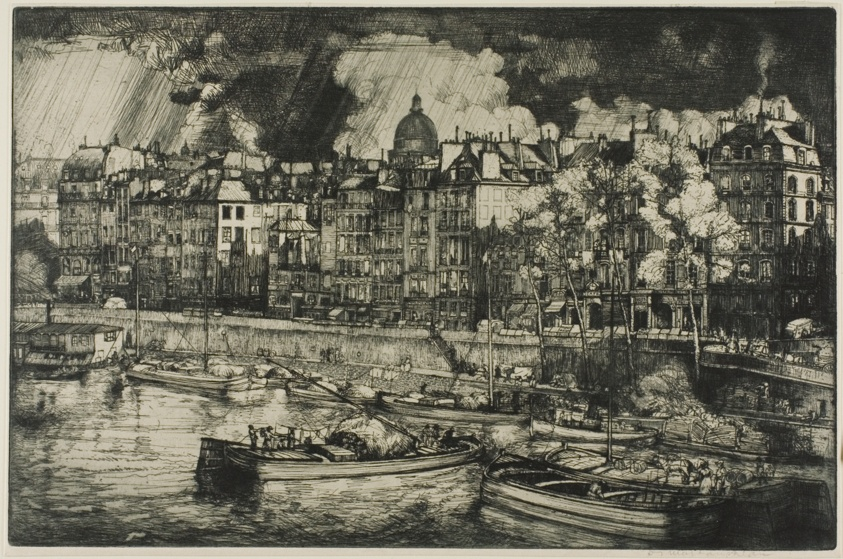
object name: Print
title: Quai des Grands Augustins, Paris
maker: Donald Shaw MacLaughlan (American, 1876-1938)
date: 1906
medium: Etching in black on ivory wove paper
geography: United States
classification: etching; print; prints and drawing